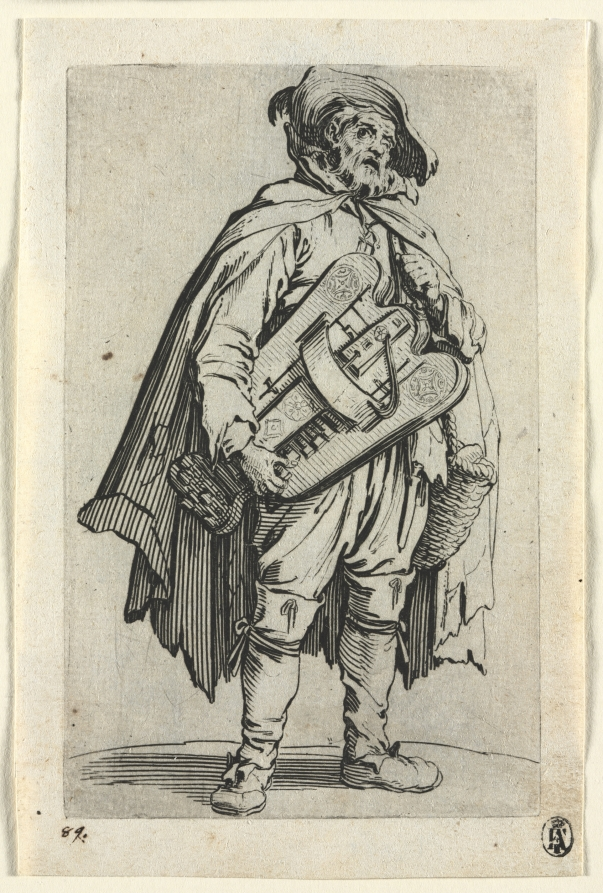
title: The Beggars: The Hurdy-Gurdy Player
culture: France, 17th century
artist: Jacques Callot (French, 1592–1635)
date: c. 1623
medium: etching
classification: Print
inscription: Inscribed lower left in pen and brown ink: "89."